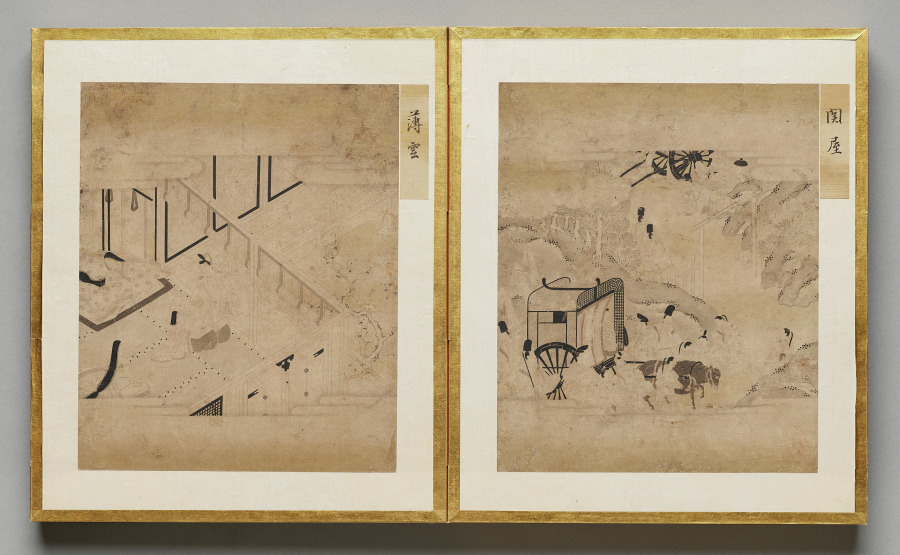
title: Gatehouse from Album of Illustrations for the Tale of Genji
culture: Japan, Edo period (1615–1868)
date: 1600s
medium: painting in an accordion-style album; ink, light color, and gold on paper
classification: Bound Volume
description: This album contains illustrations for the classic literary work the Tale of Genji, authored in the 1000s by Murasaki Shikibu, an aristocrat of the Heian period (794–1185) court. The scenes are painted in the “white drawing” (hakubyō) mode, in which a fine ink line is used to depict figures and spaces with great subtlety, punctuated only occasionally by traces of red pigment for a character’s lips, a detail of a garment, or a decorative element. These two scenes illustrate episodes from the chapters “Thin Veil of Cloud” (Usugumo) and “Barrier Gate” (Sekiya).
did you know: The illustrations are identified by chapter title in cartouches to the upper right of the paintings.